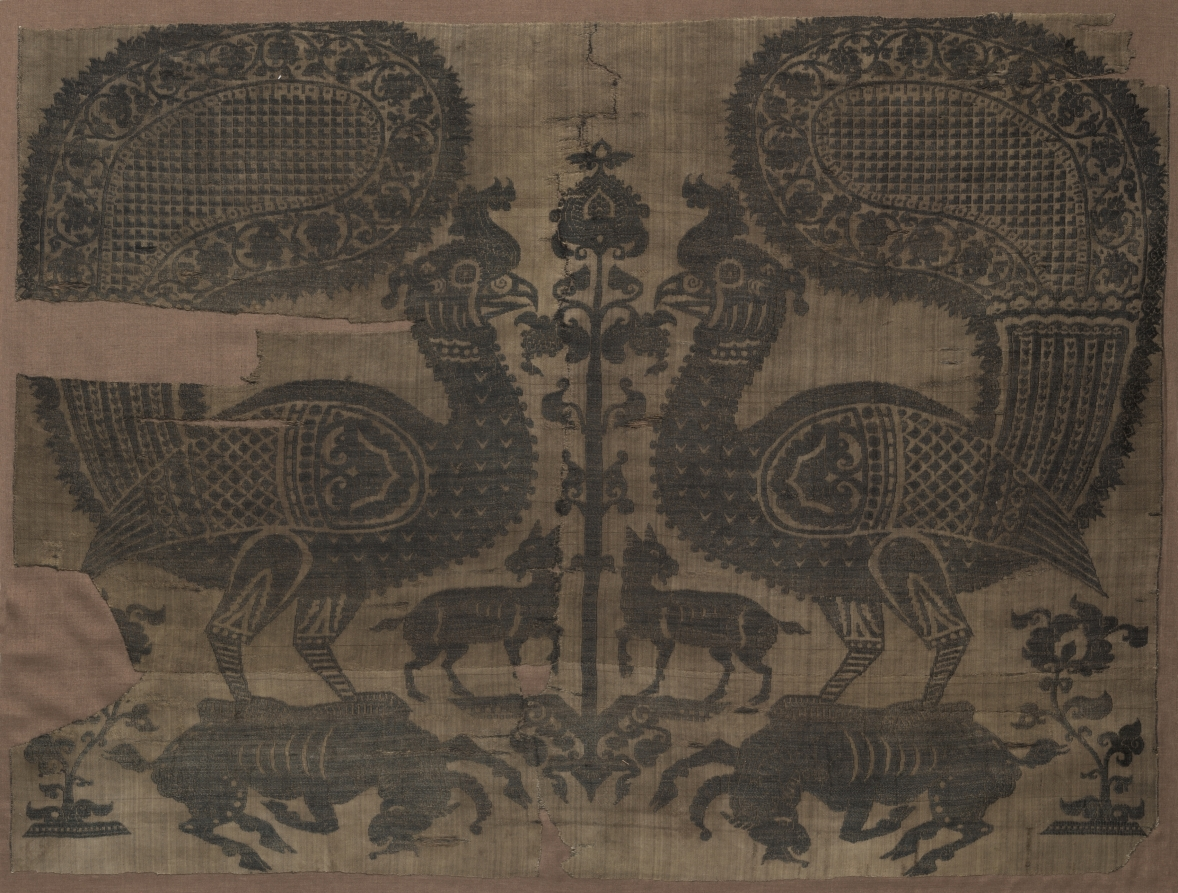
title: Fragment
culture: Iraq or Iran, in the style of the Buyid period (945–1055)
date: before 1961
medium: Silk: lampas weave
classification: Textile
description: The fragment preserves a tree of life flanked by a pair of large confronted simurghs, resembling peacocks, that grasp ibexes in their talons. A pair of small goats stand confronted and regardant at the base of the tree. Behind each ibex is a small palmette tree. The fragment constitutes the center third of a complete loom piece. The pattern is dark purplish brown on a golden brown ground.